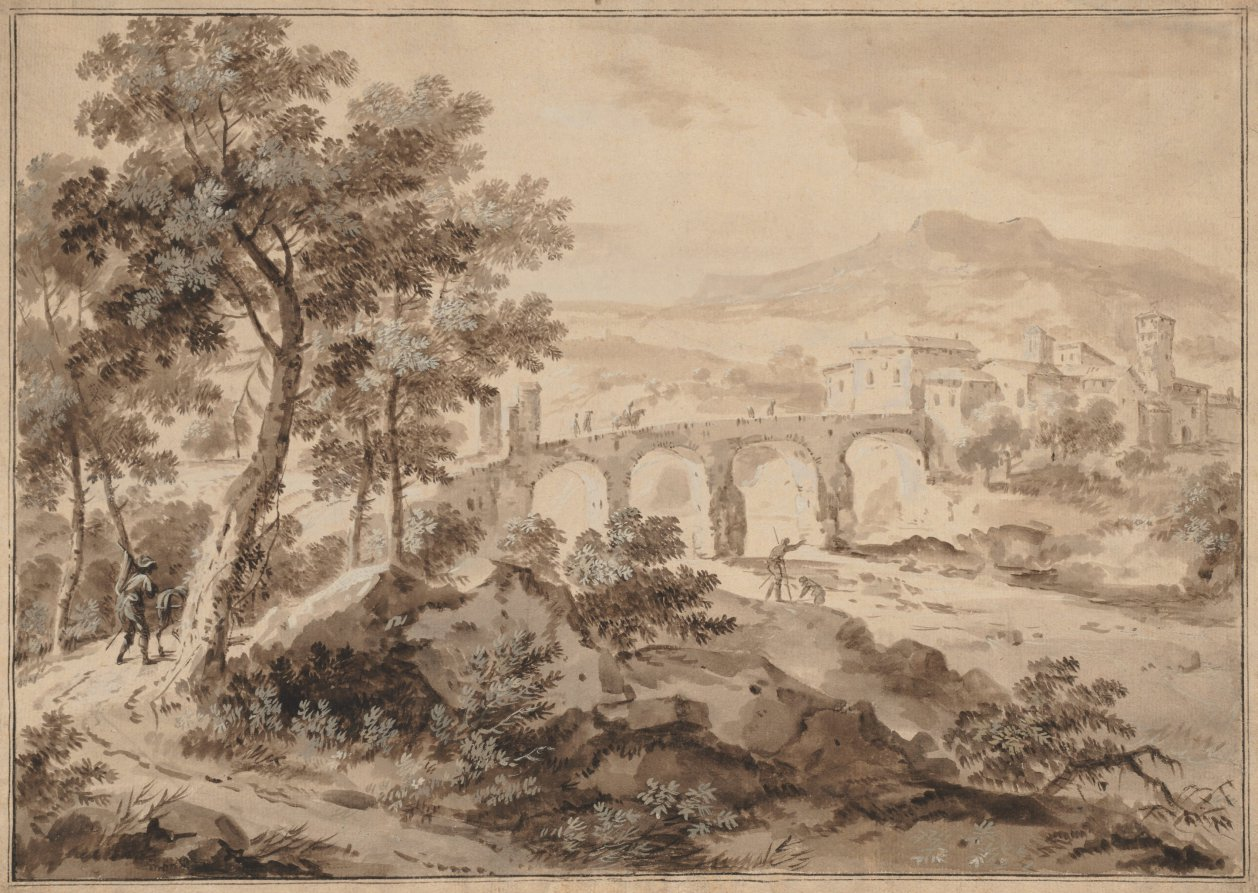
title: Landscape with Bridge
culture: Italy, 1st third 18th Century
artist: Marco Ricci (Italian, 1676–1729)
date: 1700–1729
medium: brush and brown wash with green gouache, heightened with lead white; framing lines in brown ink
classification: Drawing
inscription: lower right, in graphite: 2